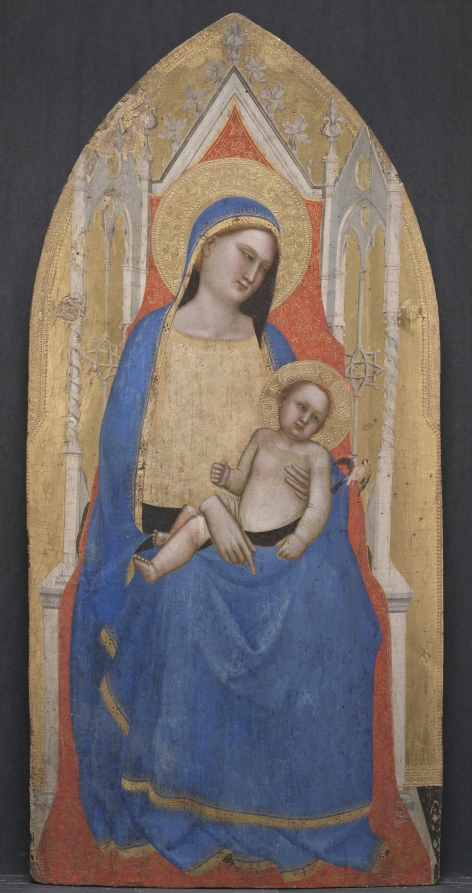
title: Madonna and Child Enthroned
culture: Italy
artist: Master of San Lucchese (Italian, c. 1335–1380)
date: c. 1350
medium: tempera and gold on poplar panel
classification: Painting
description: Seated on an elaborate throne, the Madonna’s weighty majesty emphasizes her role as the Queen of Heaven as she gazes at her infant son. The child, in turn, stares at the viewer. To Christ’s right is a fluttering goldfinch, a bird that was believed to nest in thorny trees and, according to legend, removed a painful spine from Christ’s crown of thorns. At that moment, a drop of his blood fell onto the goldfinch, forever giving it red markings. The precise identity of this artist has not yet been discovered, and little is known about his training or career. He receives his name after an altarpiece in the church of San Lucchese in Poggibonsi, near Siena.